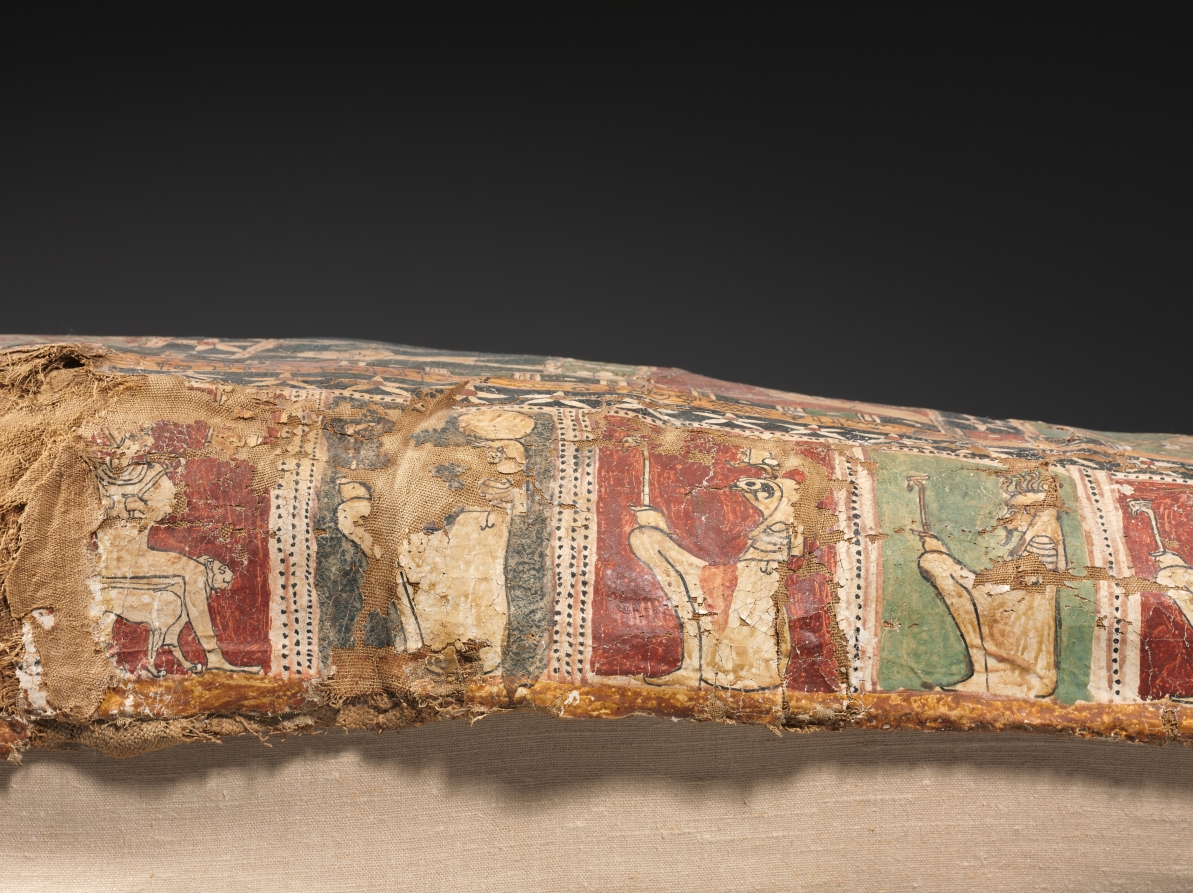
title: Cartonnage Mummy Case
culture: Egypt, Greco-Roman period (332 BCE–395 CE), Ptolemaic dynasty (305–30 BCE)–Roman empire (30 BCE–395 CE)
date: c. 50 BCE–50 CE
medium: cartonnage, painted and gilded, with glass inlays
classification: Funerary Equipment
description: This mummy case is made of cartonnage, a material similar to papier-mâché, but using layers of linen rather than paper. Cartonnage mummy cases such as these are contemporary with funerary portraits painted on wood or linen, although they present a very different appearance. The face, modeled in plaster, is bland and idealized, although the effect of the gilding and glass inlays is quite dazzling. The body is painted with traditional, age-old funerary motifs: the god Osiris, seated and mummiform; the fetish of Abydos, holy city of Osiris, flanked by standing deities (Thoth and Shu); a Horus falcon with outspread wings, and the bark of Sokar. Below these are the sandaled feet of the deceased. On the sides are rows of seated deities. On the top of the head are a winged scarab beetle flanked by Anubis jackals. On the foot are painted the soles of the deceased’s sandals, flanked by scorpions for protection.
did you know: This coffin is smaller and later in date than the other coffins in this gallery. It is made of cartonnage, which used layers of linen to create a material similar to papier-mâché. The painted portrait head displays the influence of Roman portraiture at this time and incorporates both gilding and glass inlays. Despite the fragile materials, this mummy case survived due to the very dry desert climate in which it was found.